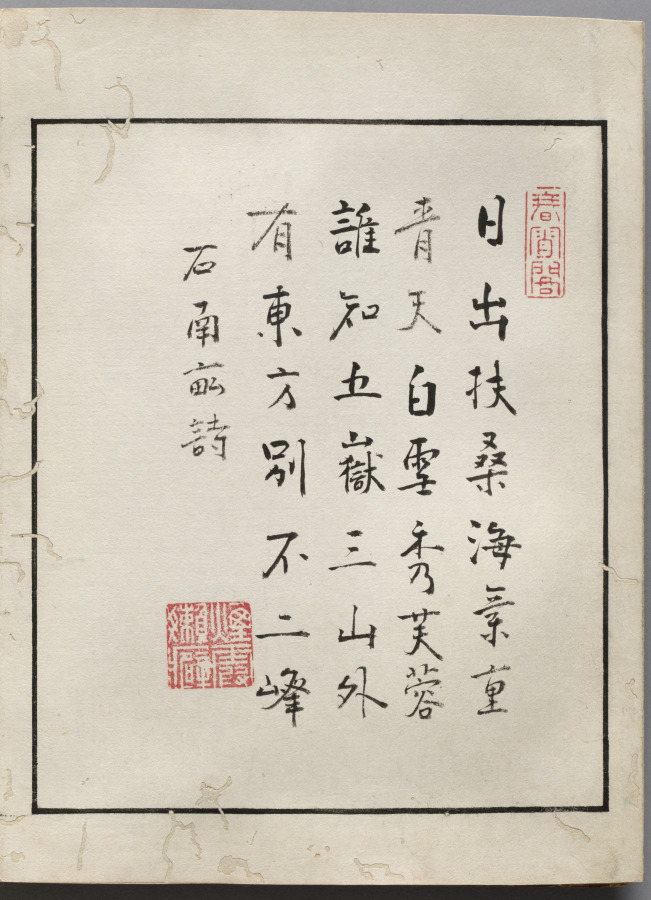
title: Double-Leaf from Album of Actor Portraits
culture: Japan, Edo period (1615–1868)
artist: Shōrakusai (Japanese)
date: c. 1790–1810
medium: double-leaf from an accordion-style album; ink on paper (right) and ink and color on silk (left)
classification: Bound Volume